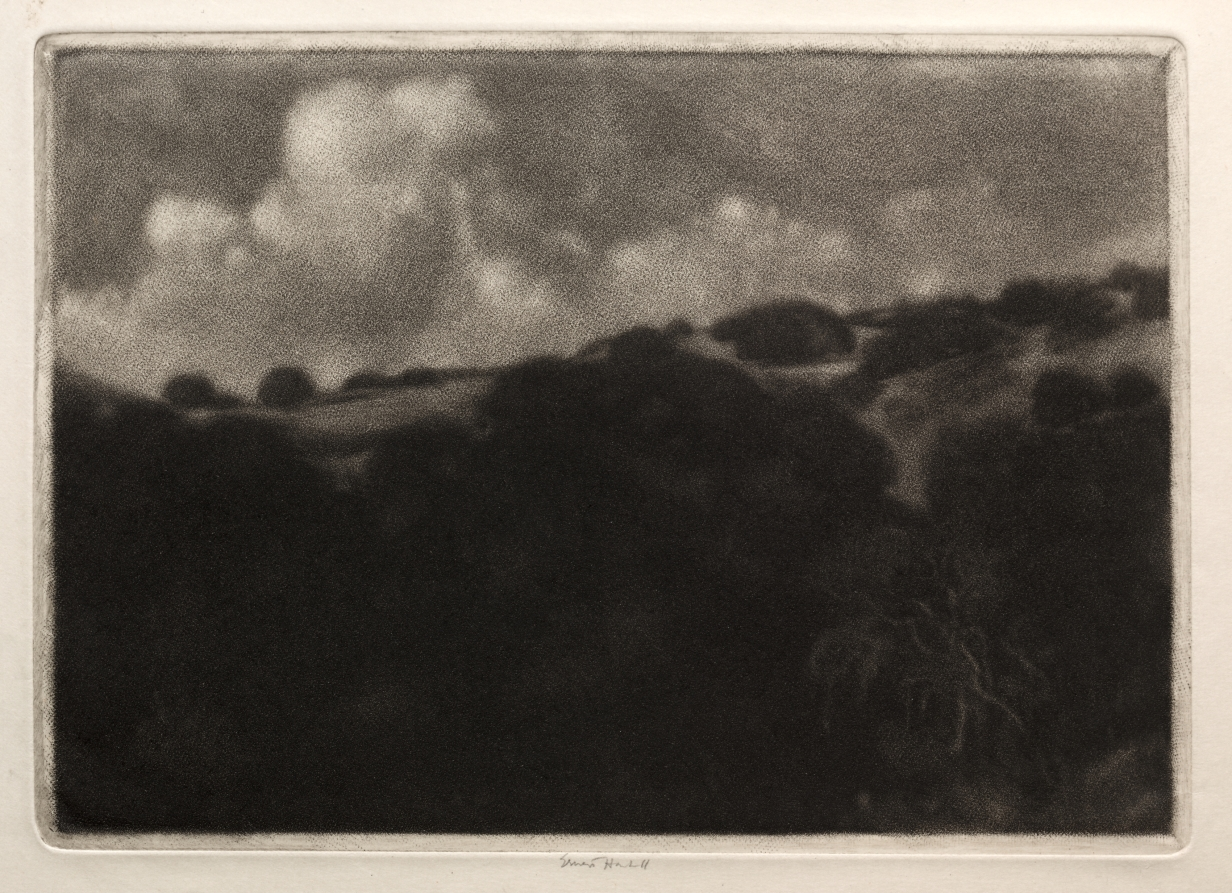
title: Night - California Hills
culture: America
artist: Ernest Haskell (American, 1876–1925)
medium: mezzotint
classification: Print